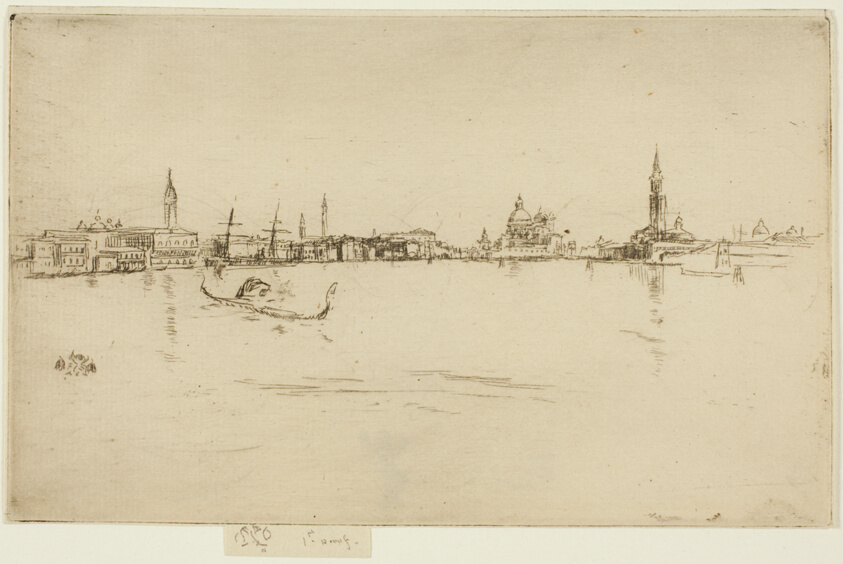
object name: Print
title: Salute Dawn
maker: James McNeill Whistler (American, 1834-1903)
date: 1879/80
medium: Etching and drypoint with foul biting in black ink on cream Japanese paper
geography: United States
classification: etching; foul biting; print; prints and drawing; paper; drypoint